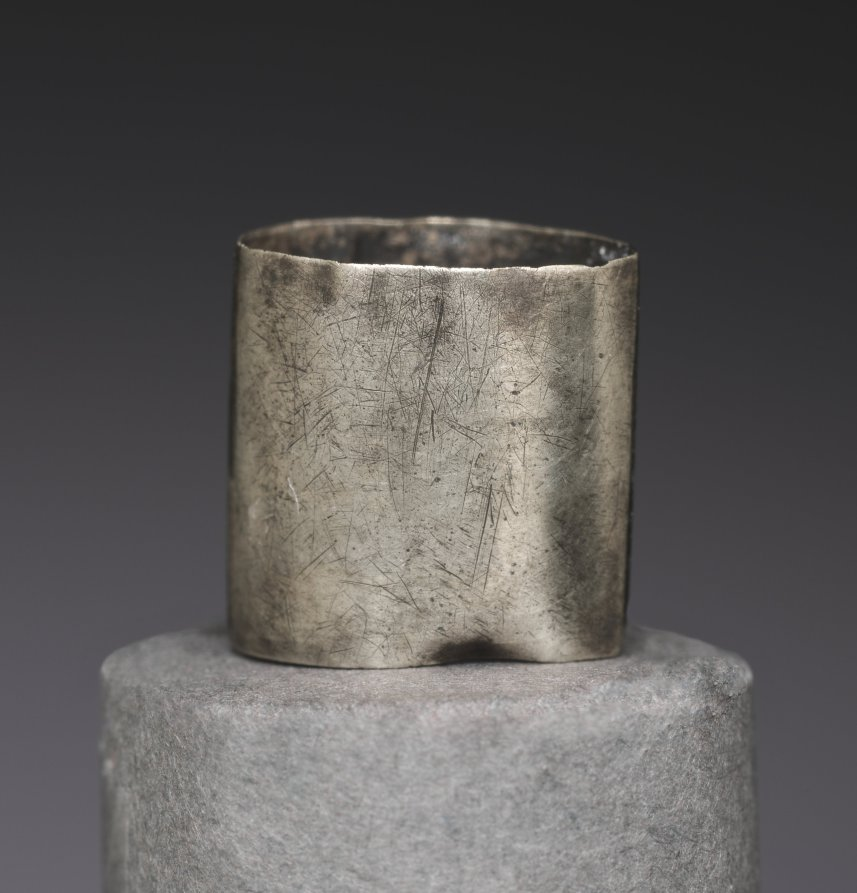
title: Element of Wig Decoration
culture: Egypt, Middle Kingdom (2040–1648 BCE), Dynasty 12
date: 1980–1801 BCE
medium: silver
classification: Jewelry